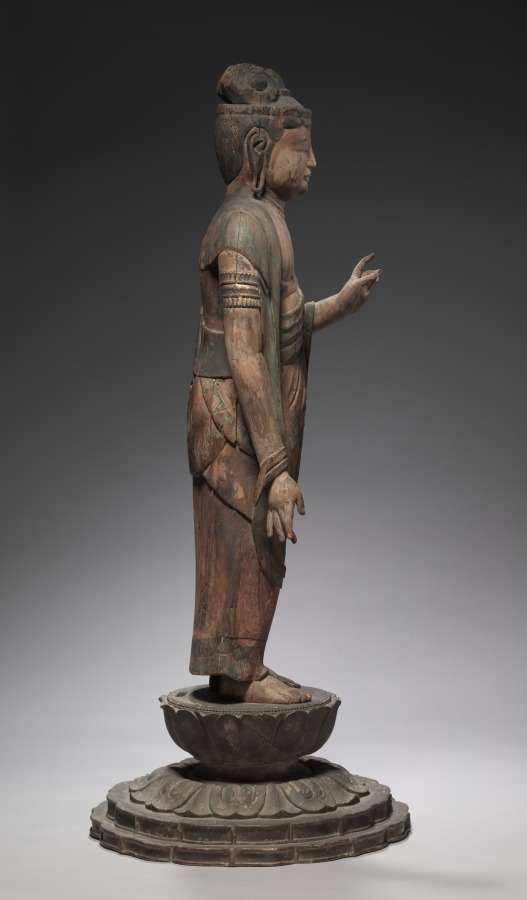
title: Shō Kannon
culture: Japan, Heian period (794–1185)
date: 900s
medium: Wood with traces of color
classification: Sculpture